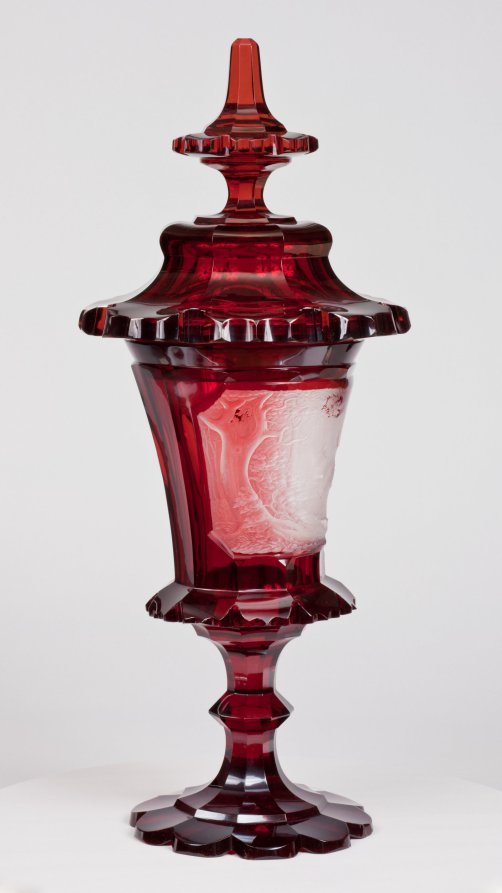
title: Covered Cup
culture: Bohemia, 19th century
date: mid-1800s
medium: ruby glass with engraved decoration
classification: Glass